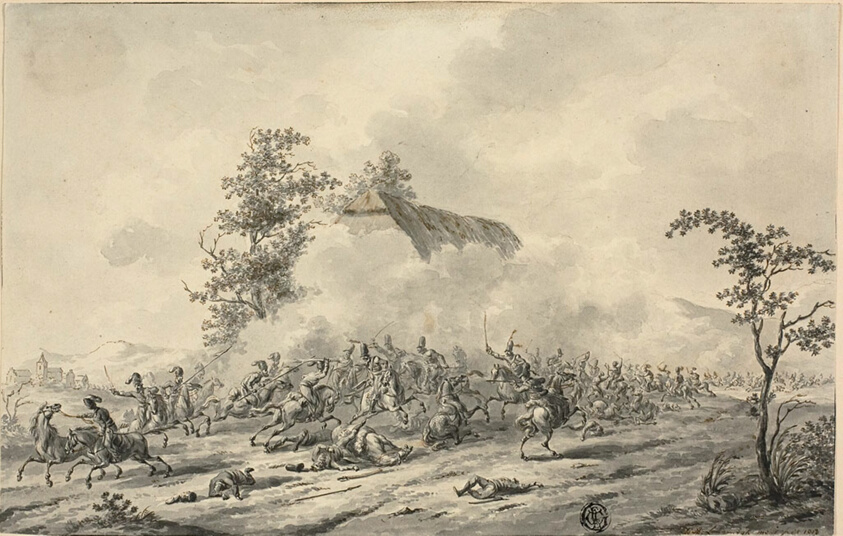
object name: Drawing and Watercolor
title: Cavalry Battle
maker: Jan Antony Langendijk (Dutch, 1780-1818); and Dirk Langendijk (Dutch, 1748-1805)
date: 1803–07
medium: Pen and brown ink and brush and gray wash, over traces of graphite, on ivory laid paper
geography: Holland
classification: ink or chalk wash; drawings (visual works); prints and drawing